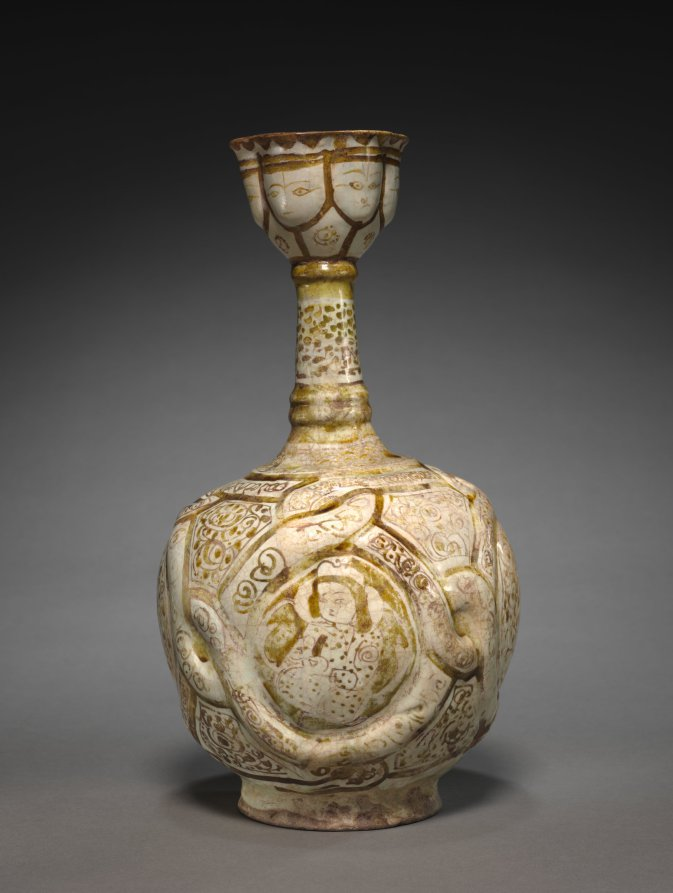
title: Jug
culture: Iran, Rayy, Seljuk period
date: late 1100s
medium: fritware with luster-painted design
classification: Ceramic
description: Fritware Where fine clay was unavailable, potters made a paste out of ground quartz, clay, and glass. When fired, the paste created a compact white material called fritware that approximated the appearance of porcelain.